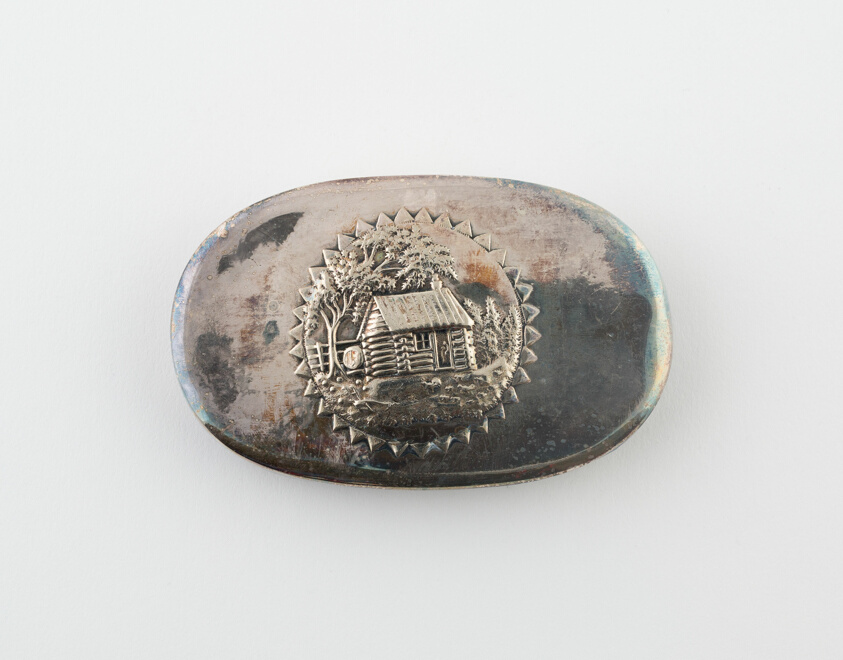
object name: Metalwork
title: Tobacco Box with Log Cabin (Symbolic of William Henry Harrison Campaign)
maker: Possibly Birmingham or Sheffield, England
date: c. 1880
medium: Silver plate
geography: Birmingham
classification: container for personal use; box; european decorative arts; metalwork; silver; decorative object/ornament